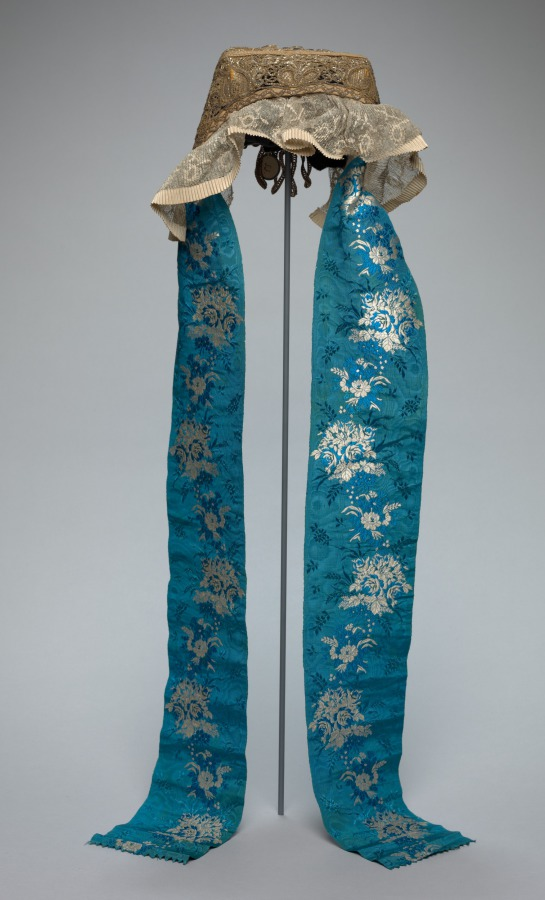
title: Headdress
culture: Germany, Buckeburg, 18th century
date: 1700s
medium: embroidery, gold thread; decorated with gold lace and streamers of moiré ribbon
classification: Garment